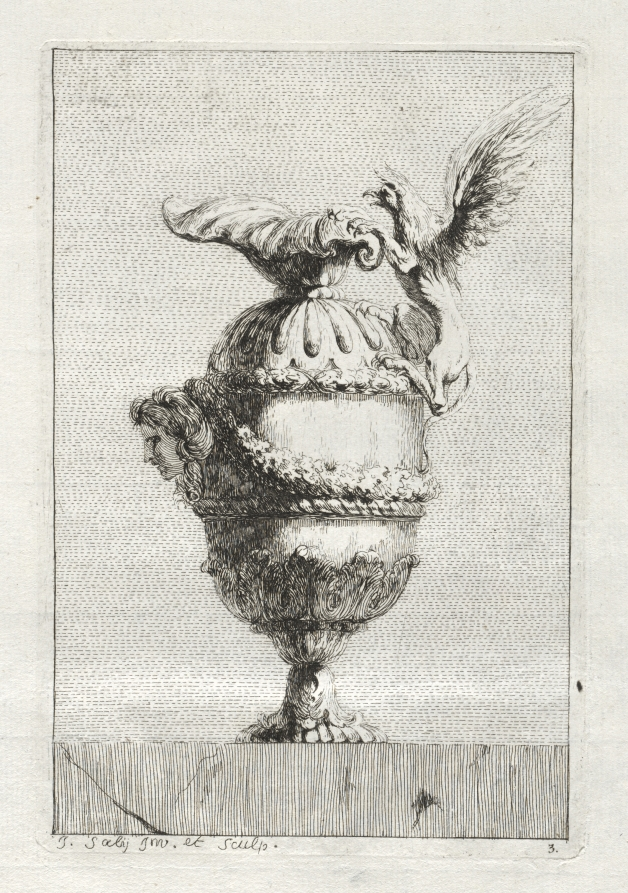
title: Suite of Vases: Plate 3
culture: France, 18th century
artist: Jacques François Saly (French, 1717–1776)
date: 1746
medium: etching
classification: Print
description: Designing ornamental vases or urns was particularly popular during the mid-18th century since the only limit to the possibilities was the imagination of the artist. Saly, a sculptor by training, was a student at the French Academy in Rome from 1740 to 1746, at which time he published a set of 30 etchings. Saly began with basic antique vase forms but deviated from classical ornament to use a rich variety of fantastic creatures for embellishment.